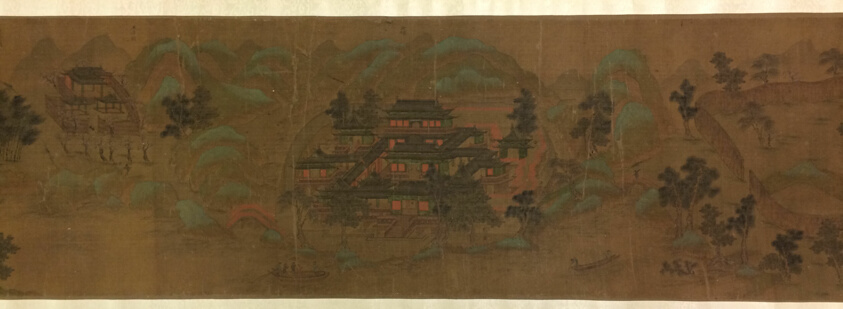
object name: Painting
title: The Wangchuan Villa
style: Chinese (culture or style)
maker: Artist unknown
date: Ming or Qing dynasty, 17th–18th century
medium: Handscroll; ink, color, and gold on silk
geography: China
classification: handscroll; painting; asian art